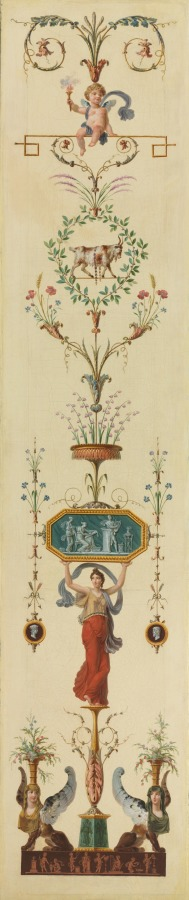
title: Decorative Panel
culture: France, 18th century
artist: Pierre Rousseau (French, 1751–1829)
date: 1790s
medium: oil on canvas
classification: Painting